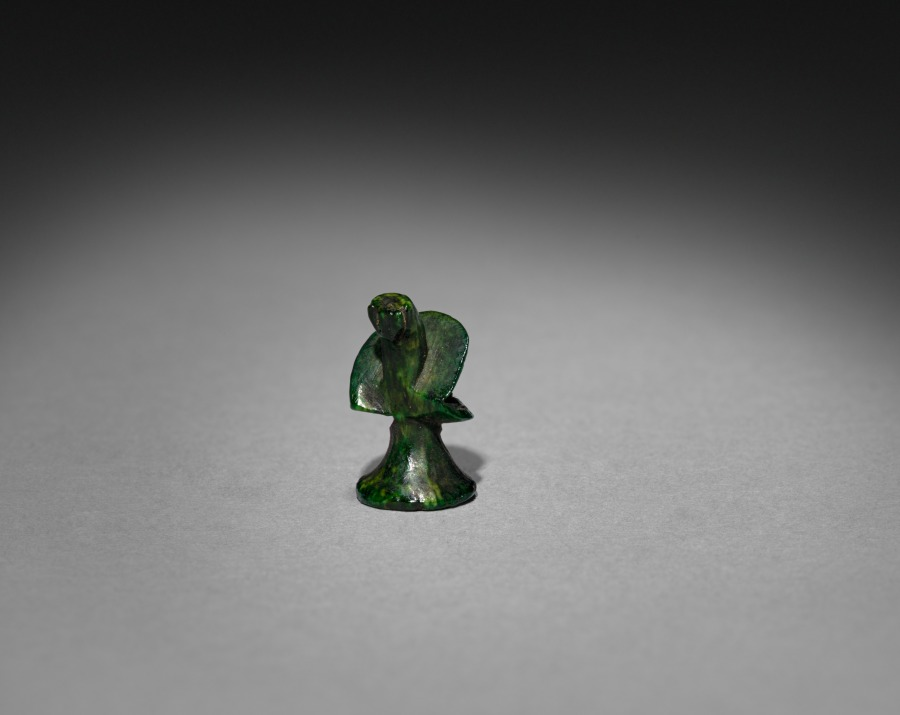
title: Snuff Bottle (stopper)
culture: China, Qing dynasty (1644-1911)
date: 1644–1911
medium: glass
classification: Glass